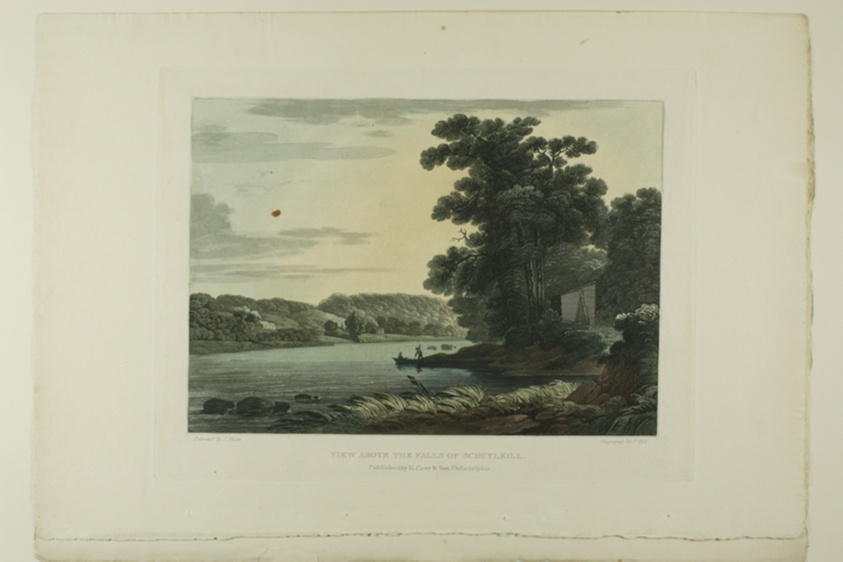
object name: Print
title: View above the Falls of Schuylkill, plate three of the first number of Picturesque Views of American Scenery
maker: John Hill (American, 1770-1850); after Joshua Shaw (American, born England, c. 1777-1860); published by Matthew Carey & Son (American, active 1795-1821)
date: 1819/21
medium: Aquatint with etching and hand-coloring on cream wove paper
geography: United States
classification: aquatint; portfolio; prints and drawing; print